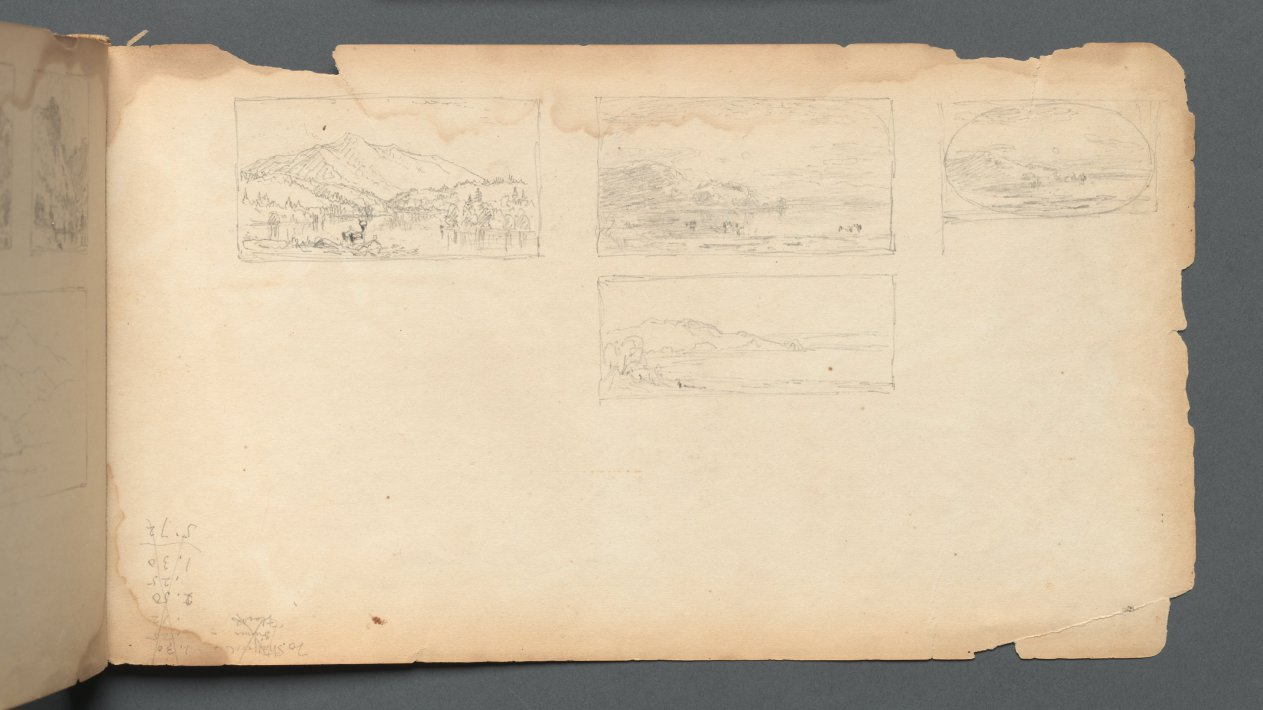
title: Sketchbook, page 40: Maine Landscape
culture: America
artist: Sanford Robinson Gifford (American, 1823–1880)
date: 1859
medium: graphite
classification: Bound Volume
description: Gifford was an American landscape painter belonging to the second generation of Hudson River school artists. Based in New York City with a studio at the Tenth Street Studio Building, Gifford took annual summer trips to the Catskills, the Adirondacks, and other scenic locations in New England. This sketchbook accompanied the artist on his expedition in 1859 to New Hampshire and Maine, where he drew sites such as Dixville Notch, the White Mountains, and Peaks Island, Casco Bay. Gifford used such graphite studies as the basis for oil paintings worked up in his studio, such as A Home in the Wilderness (1866).